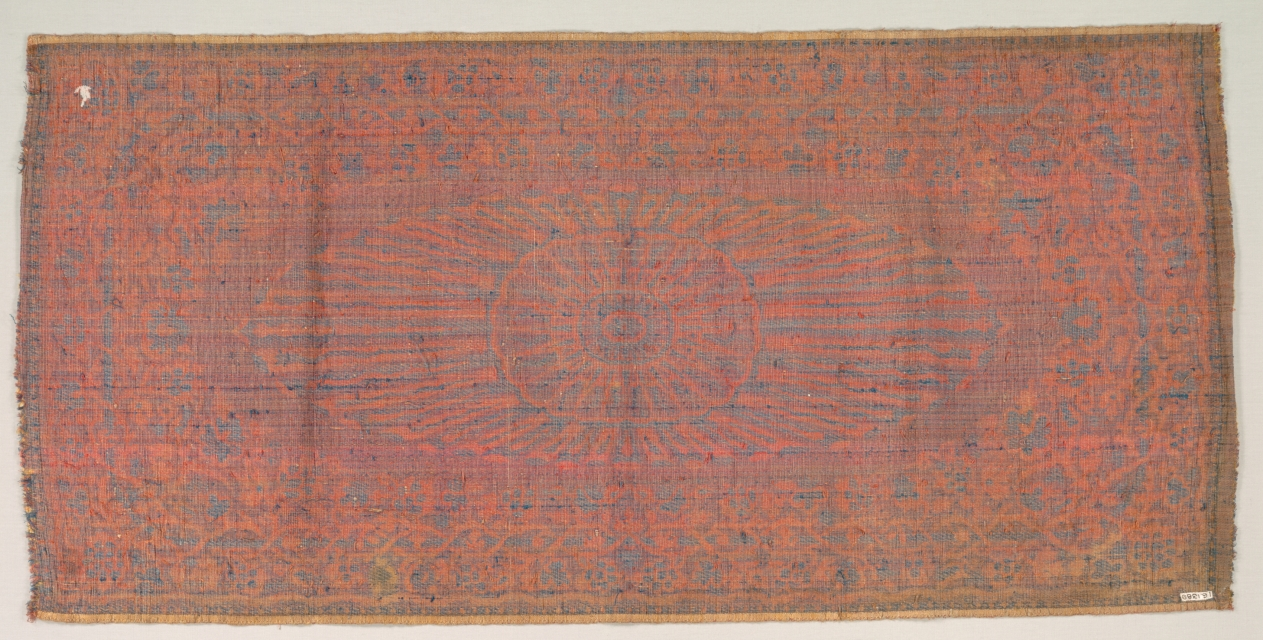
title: Cushion cover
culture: Turkey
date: 1800–1850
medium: velvet, brocaded: silk and metal thread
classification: Velvet